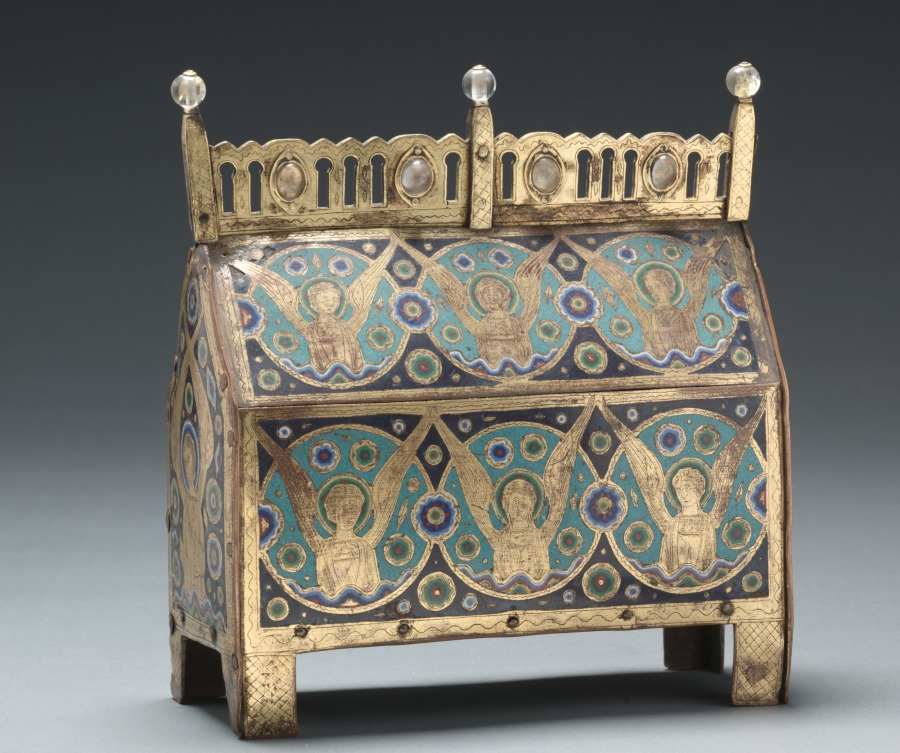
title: Chasse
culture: France, Limousin, Limoges, Gothic period, 13th century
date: c. 1225–50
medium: copper: repoussé, engraved, stippled, and gilded; champlevé enamel; oak core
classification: Enamel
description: A chasse is a container with a pyramid-shaped roof that once served as a shrine for sacred relics. During the medieval period, chasses like this one were placed on church altars during high feast days to allow the faithful to venerate their sacred contents. The chasse’s design and imagery follow a common formula with Christ’s Crucifixion and Majesty decorating the central fields of its principal face. The back consists of two panels with identical decoration. Each features three busts of angels inscribed in medallions. Of the chasse’s lateral sides, only one is preserved in its original state, decorated with the figure of an imposing angel emerging from a bank of clouds. Here, the dark blue enamel background shows an even greater variety of rosettes and other decorative motifs, all engraved, stippled, and gilded like the ones on the other sides